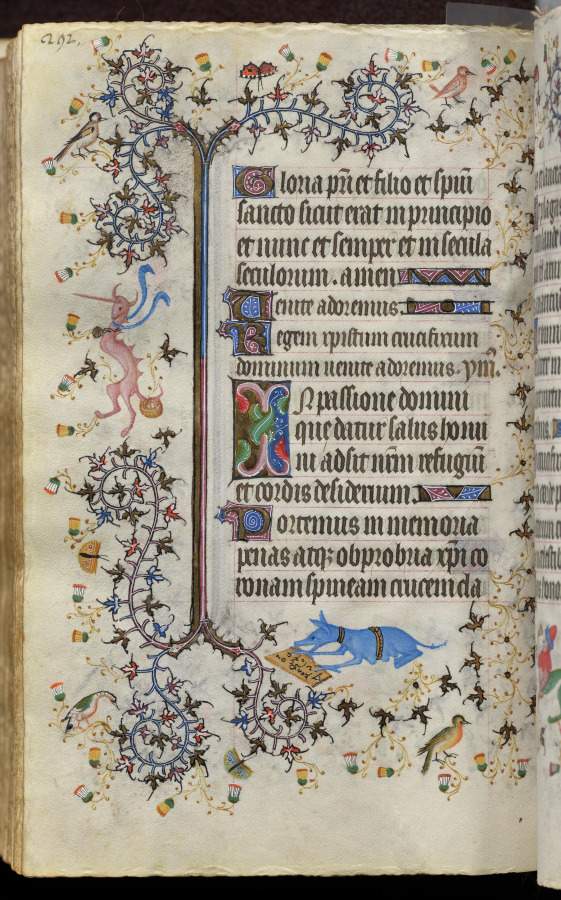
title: Hours of Charles the Noble, King of Navarre (1361-1425): fol. 146v, Text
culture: France, Paris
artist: Master of the Brussels Initials and Associates (French)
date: c. 1405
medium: ink, tempera, and gold on vellum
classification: Bound Volume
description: This precious volume was obviously highly prized by its owner, the French-born King of Navarre, who had his coat of arms painted on no less than twenty folios. Rather than directly commissioning this manuscript from a specific workshop, it seems that Charles the Noble acquired his book of hours -- perhaps ready-made for the luxury market -- while on a trip to Paris in 1404-05. A collaborative effort, six painting styles are evidenced within the pages of this codex, those of two Italians, two Frenchmen, and two Netherlanders. The painter who was responsible for the planning and decoration of the book, and who produced seventeen of the large miniatures, was a Bolognese artist known as the Master of the Brussels Initials. His principal assistant, responsible for most of the borders, was a Florentine who signed his name "Zecho" da Firenze on folio 208 verso.